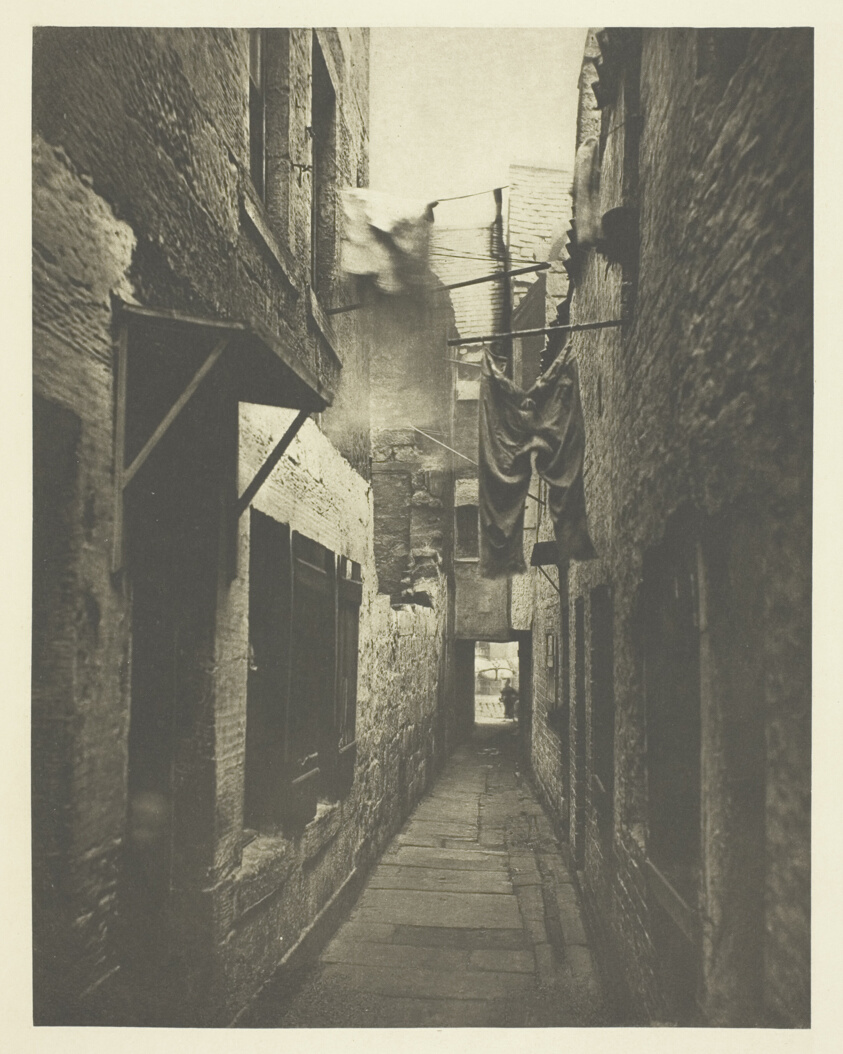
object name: Photograph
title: Close No. 101 High Street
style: 19th century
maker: Thomas Annan (Scottish, 1829–1887)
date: 1868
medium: Photogravure, plate 8 from the book "The Old Closes & Streets of Glasgow" (1900)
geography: Scotland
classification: photograph; photography